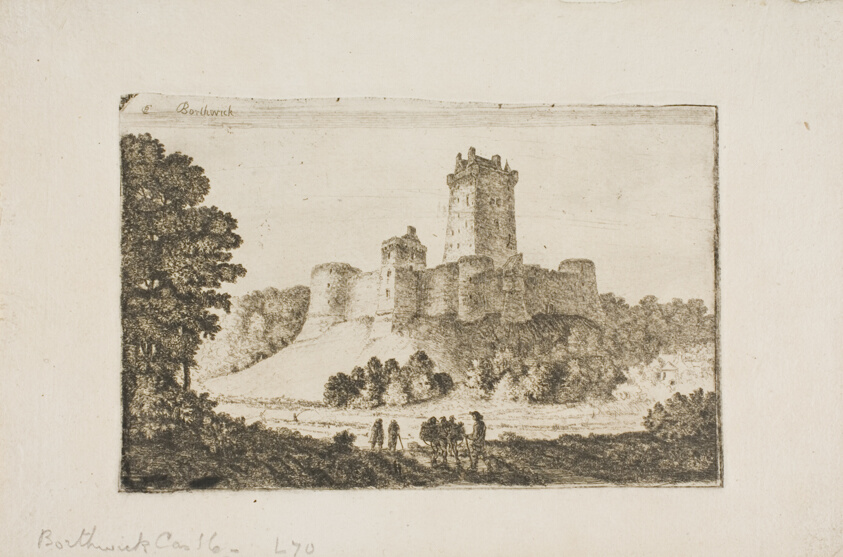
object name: Print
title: Borthwick Castle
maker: John Clerk of Eldin (Scottish, 1728-1812)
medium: Etching on paper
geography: Scotland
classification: etching; print; prints and drawing